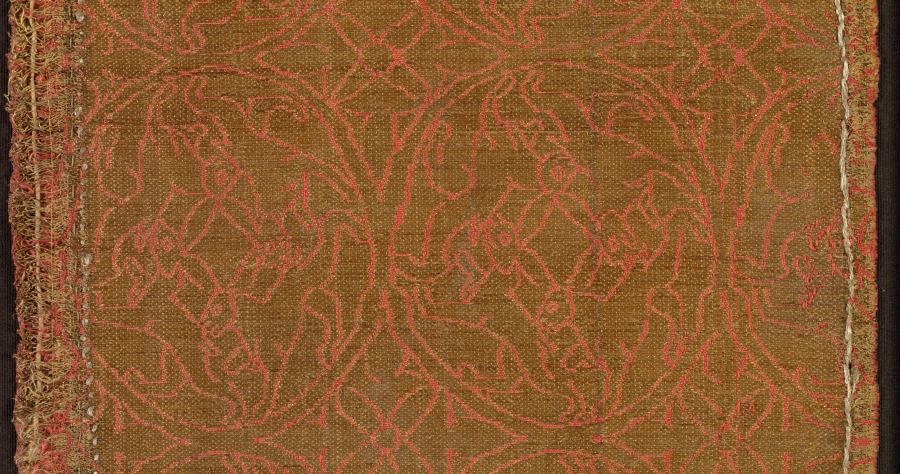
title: Cloth of Gold with Rabbit Wheels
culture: Eastern Iran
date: c. 1225–50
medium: Silk and gold thread: lampas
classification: Textile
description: Cloth of Gold with Rabbit Wheels Lampas; silk and gold thread Eastern Iranian world, about 1225-1260 The Cleveland Museum of Art, John L. Severance Fund 1993.140 (Cat. no. 45) The lavish amount of gold-used here for both the pattern and the background-reflects the extravagant taste of the Mongols. Known as "cloths of gold," such textiles were primarily woven for the official costumes of the Mongol court. Repeated roundels enclose four rabbits that share two pairs of ears and run in a circle. This motif, known as an animal wheel, is very ancient in Asia. Rabbits are commonly found on eastern Iranian metalwork dating from around 1200. Although the Mongol conquest of the Eastern Iranian world had taken place (1220-22), traditional silk patterns continued to be produced through the mid-1200s.